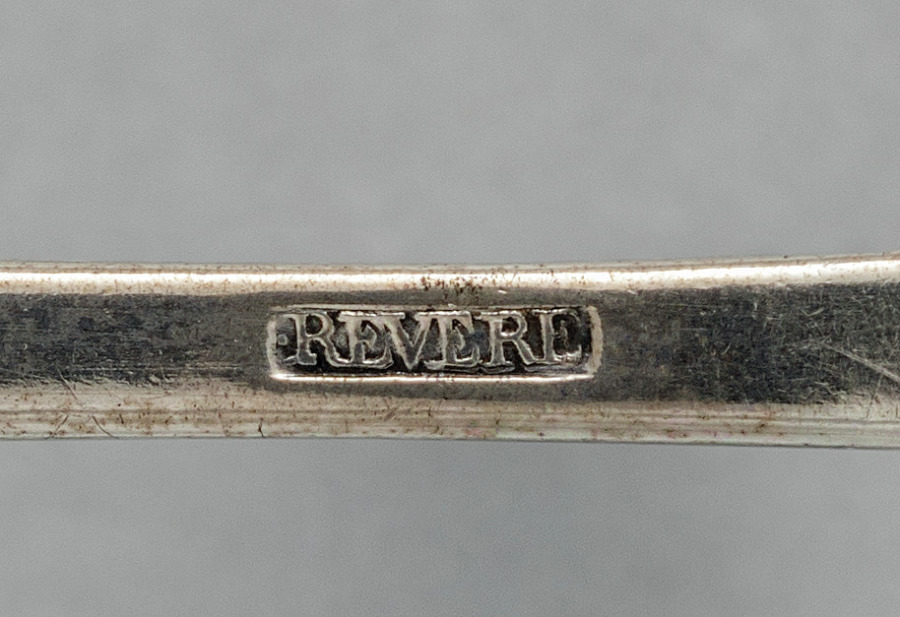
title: Tablespoon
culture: America, Massachusetts, Boston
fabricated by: Paul Revere II (American, 1735–1818)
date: c. 1785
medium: silver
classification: Silver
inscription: engraved: "MM" in bright-cut script on top of handle end.